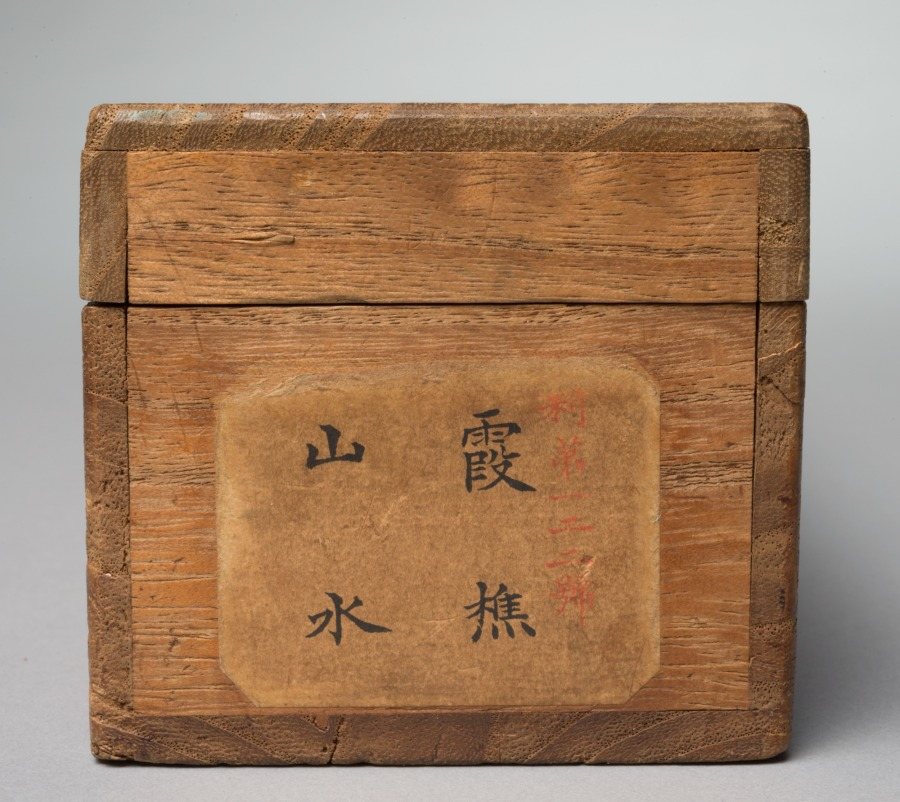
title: Fishing in Springtime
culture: Japan, Edo period (1615–1868)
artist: Ike Taiga (Japanese, 1723–1776)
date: 1700s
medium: Hanging scroll; ink and color on silk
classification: Painting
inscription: Signature: 霞樵, transliteration, Kashō; seals: 池無名印, transliteration, Ike Mumei in; 三岳道者, transliteration, Sangaku Dōja; 遵生, transliteration, Junsei.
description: Ike Taiga was subject to many artistic influences; we know he practiced Zen calligraphy from an early age, his father may have had ties to the famous painter Ōgata Kōrin (1658–1716), he may have trained under a Tosa school painter, and he is thought to have seen Western images early on that informed his approach in representing depth. Though he started with professional beginnings—making a living after his father’s death by selling paintings on fans—he surrounded himself with the members of the literati community, and never stopped absorbing stylistic influences from diverse sources throughout his career. As a result, his style is unique and aesthetically definitive of nanga—the name given to Japanese literati painting.